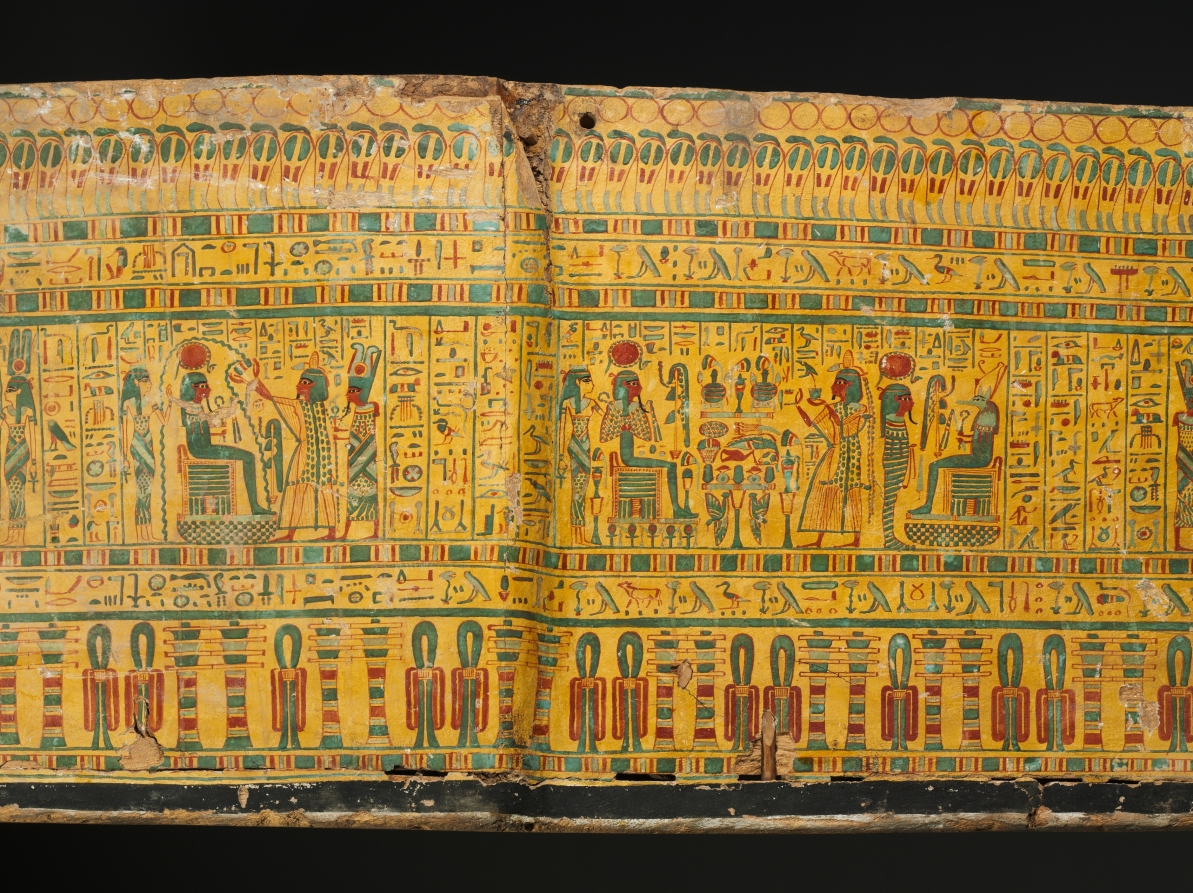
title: Coffin of Bakenmut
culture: Egypt, Thebes, Third Intermediate (1069–715 BCE), Dynasties 21–22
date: c. 1000–900 BCE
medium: gessoed and painted sycamore fig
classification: Funerary Equipment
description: The coffin of Bakenmut is one of the finest examples of painted wooden coffins made for the priests of Amen and their families at Thebes during Dynasty 21 and early Dynasty 22. The pharaohs of this time were no longer buried in the Valley of the Kings, but instead built tombs in the Delta, far to the north, where they resided. Security was lax in the Theban necropolis. The coffins and funerary goods of the wealthy citizens of Thebes were placed in unmarked and undecorated family tombs cut into the cliffs on the west bank of the Nile. All the care and detail that in more prosperous times were devoted to the decoration of the tomb chapel were now lavished on the elaborately painted coffins. Every available surface is crowded with religious scenes, images of funerary gods and goddesses, protective spells, and magical symbols. The deceased appears mummiform. An elaborate floral collar entirely covers the upper body, exposing only the separately attached hands (now lost). A pair of red "mummy braces" are crossed over the chest, their point of intersection marked by a winged sun disk. The lower body is covered with tiny figures modeled in gesso against a yellow background, which gives the effect of gold inlaid with glass or semiprecious stone. The decoration on the interior features two deified dead kings of Dynasty 18. Although these rulers had lived centuries before, memory of their greatness was still very much alive. The main scene near the top depicts Tuthmosis III, the great military pharaoh, who lived 500 years before Bakenmut. Posed as a mummy, the ruler wears a brilliant feathered garment enfolding him with falcon’s wings. The scene below features back-to-back seated images of Amenhotep I, regarded as the patron of the Theban cemetery and worshiped as a local god there.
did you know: Originally another smaller coffin was placed inside this outer coffin and in that the deceased with a mummy board would have rested.